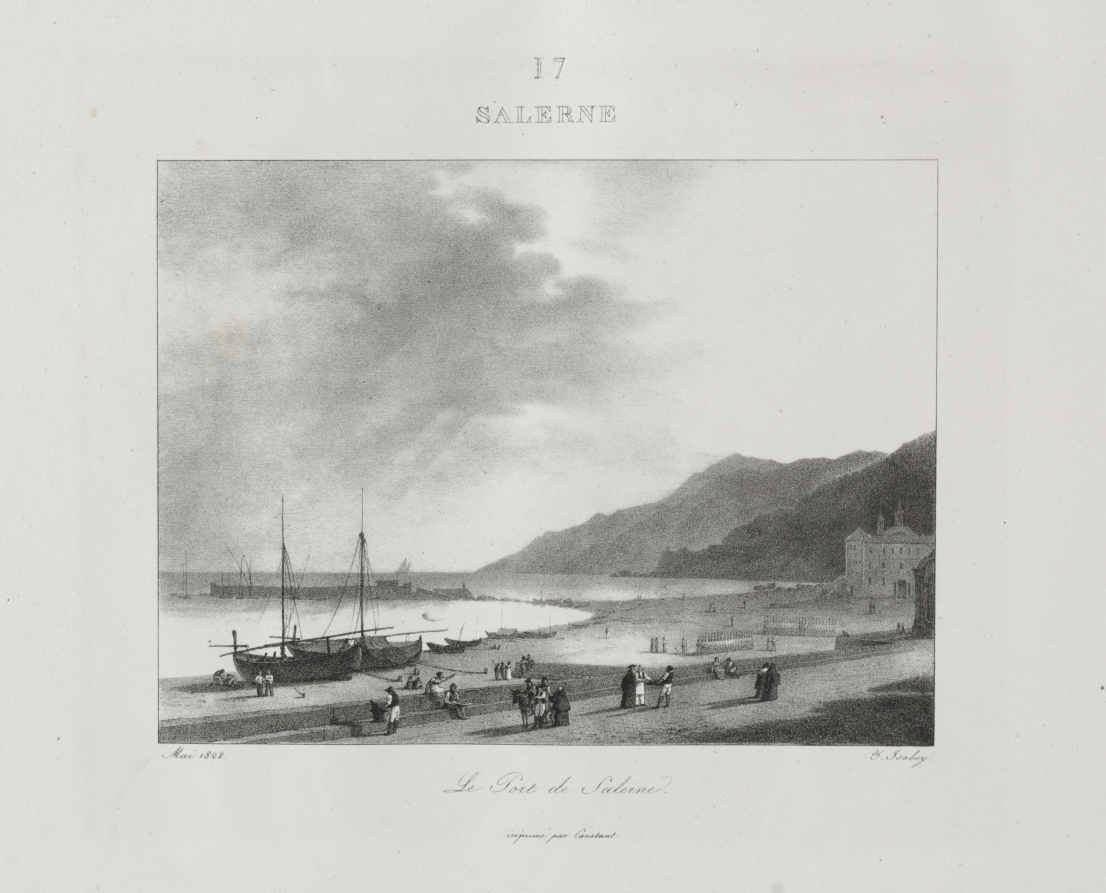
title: Voyage en Italie en 1822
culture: France, 19th century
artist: Jean-Baptiste Isabey (French, 1767–1855)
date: 1833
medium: lithograph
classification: Bound Volume